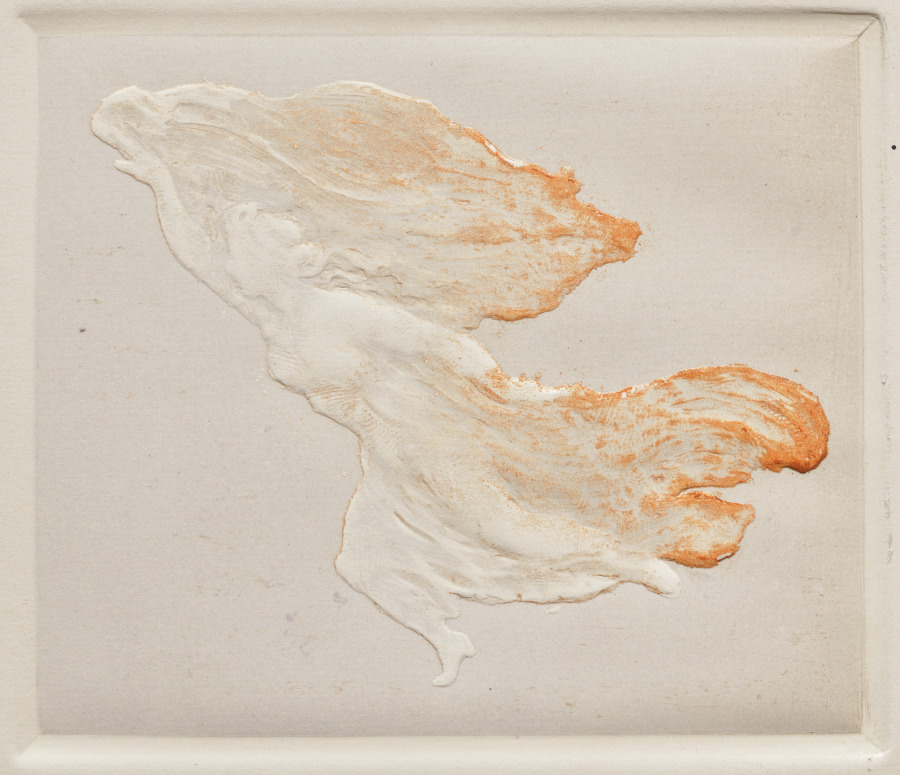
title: Dancing Woman in Running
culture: France, early 20th Century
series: La Loïe Fuller, by Roger Marx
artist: Pierre Roche (French, 1855–1922)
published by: Les Cents Bibliophiles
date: 1904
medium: gypsograph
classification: Bound Volume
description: Although best known as a sculptor, Roche was a versatile and prolific artist who worked in many mediums. Loïe Fuller, the pioneer of modern dance who took Paris by storm in 1892, was one of his favorite subjects. He portrayed her in clay, bronze, marble, plaster, and in a series of gypsographs that illustrated an essay by the art critic Roger Marx. The book was described as "a precious monument to Loïe Fuller."